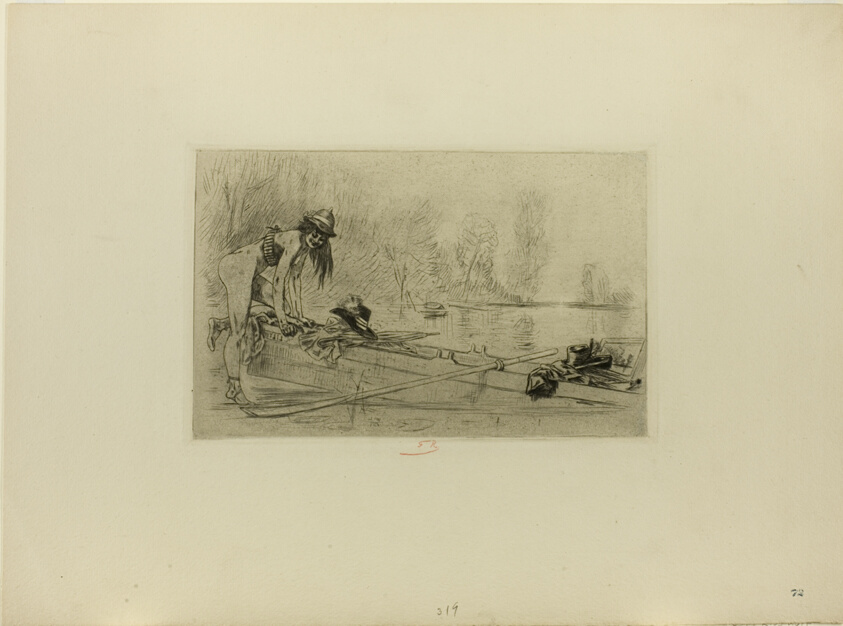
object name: Print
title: July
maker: Félicien Rops (Belgian, 1833-1898)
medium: Etching and drypoint on cream wove paper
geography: Belgium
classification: etching; print; prints and drawing